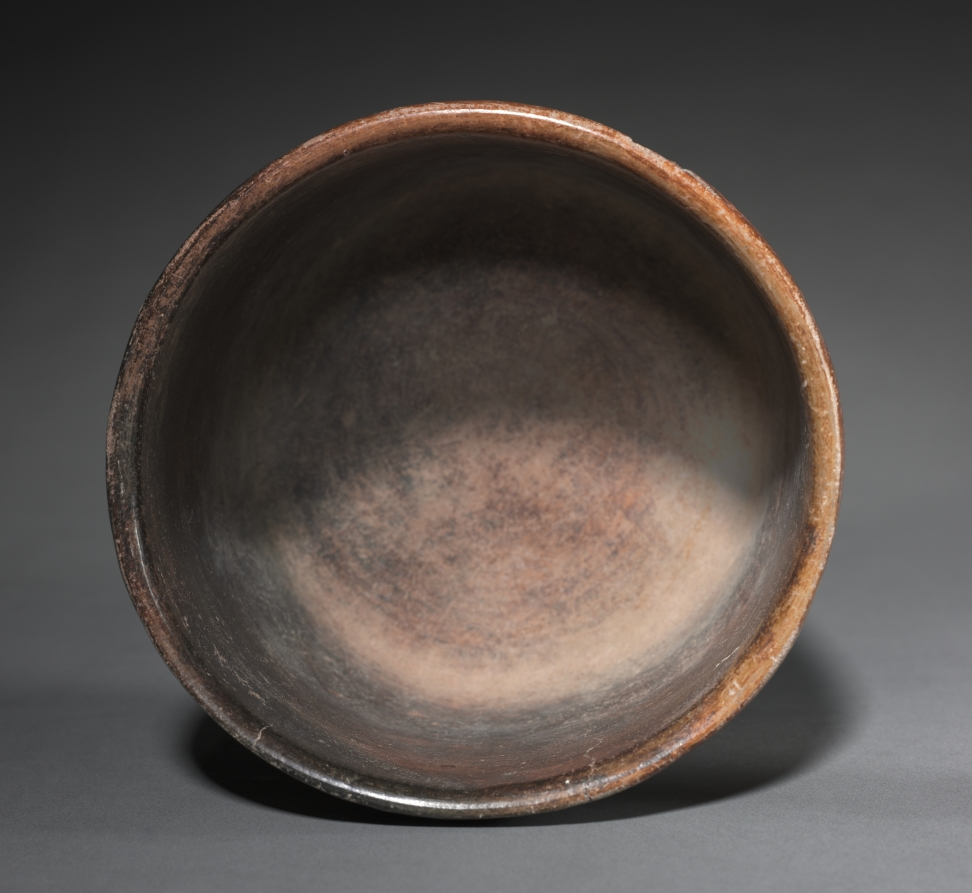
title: Carved Bowl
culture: Mexico, Central Highlands, Olmec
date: 1200–900 BCE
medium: earthenware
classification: Ceramic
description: Although the Olmec heartland is located on Mexico's Gulf Coast, sites with Olmec-style architecture and sculpture are also found in the highlands of Central Mexico. Small-scale Olmec works in jade and pottery are even more widely distributed; their ownership probably conferred great prestige.